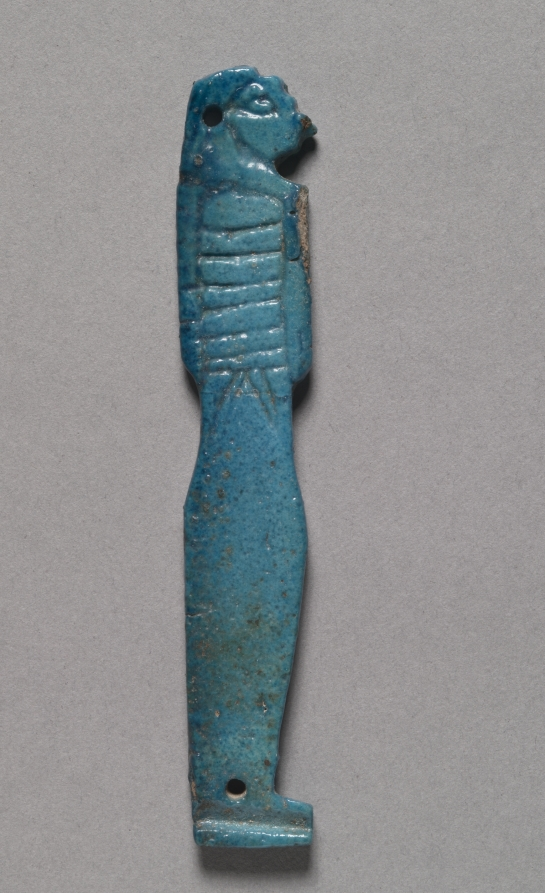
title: Son of Horus Amulet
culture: Egypt, Late period (715–332 BCE), Dynasty 26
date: 664–525 BCE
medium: bright turquoise faience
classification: Amulets